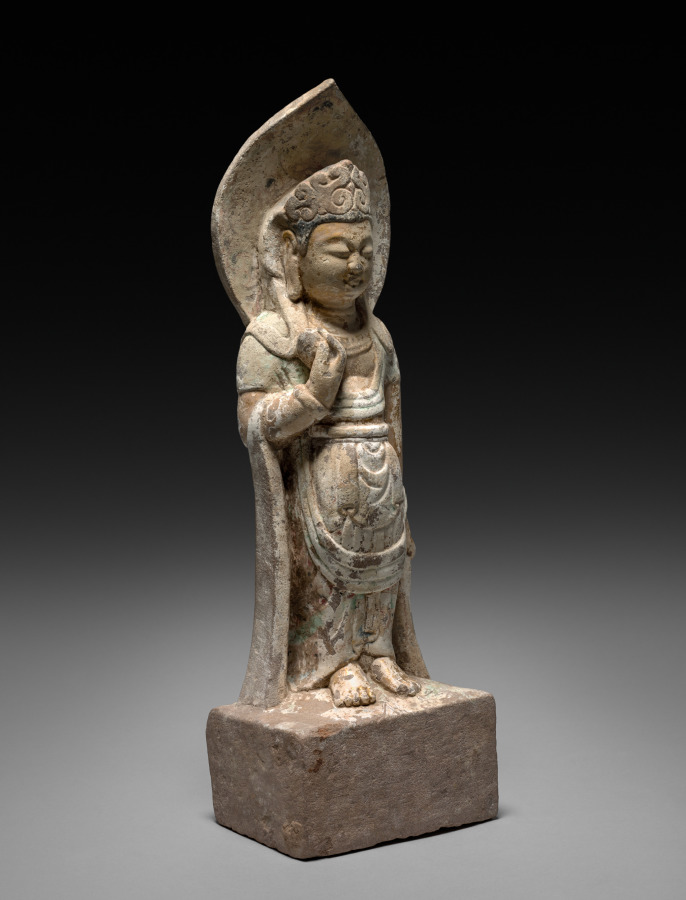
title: Bodhisattva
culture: China, Sui dynasty (581-618) - Tang dynasty (618-907)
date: late 500s–early 600s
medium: stone with polychromy and gilding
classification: Sculpture